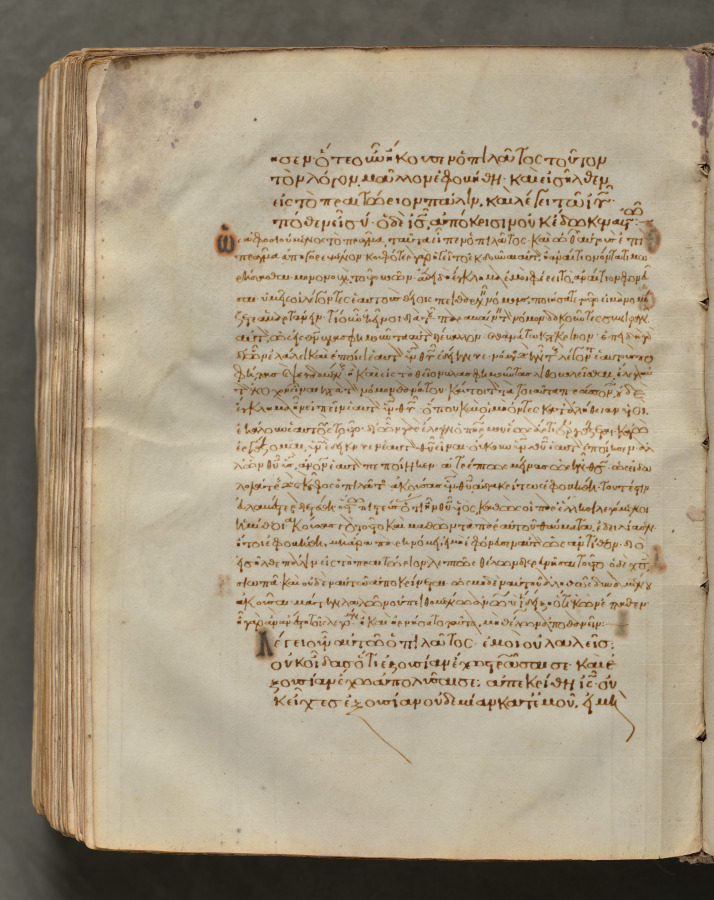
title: Text, folio 412 (verso), from a Gospel Book with Commentaries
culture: Byzantium, Constantinople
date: c. 1000–1100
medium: ink, tempera, and gold on vellum; leather binding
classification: Bound Volume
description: Each of the four gospels in this book opens on a page with brilliantly illuminated borders depicting the author of the text as well as birds—principally peacocks, symbols of the immortality of the soul—and fountains, representing the fountain of life and the salvation of the soul. This volume consists of 428 leaves with texts in Greek. Its level of sophistication suggests that it was probably written and decorated in a monastery in Constantinople.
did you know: Gospel books were carried in procession through Byzantine churches.